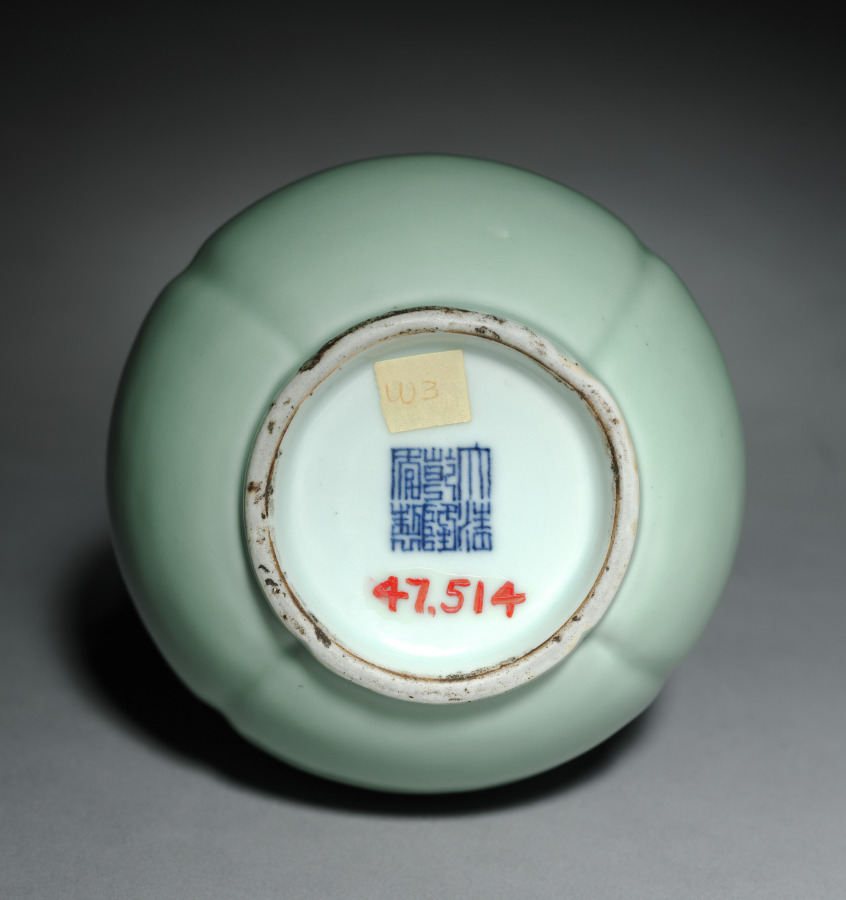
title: Double-gourd Shaped Bottle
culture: China, Qing dynasty (1644–1911), Qianlong mark and reign (1736–95)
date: 1736–95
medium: porcelain with celadon glaze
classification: Ceramic